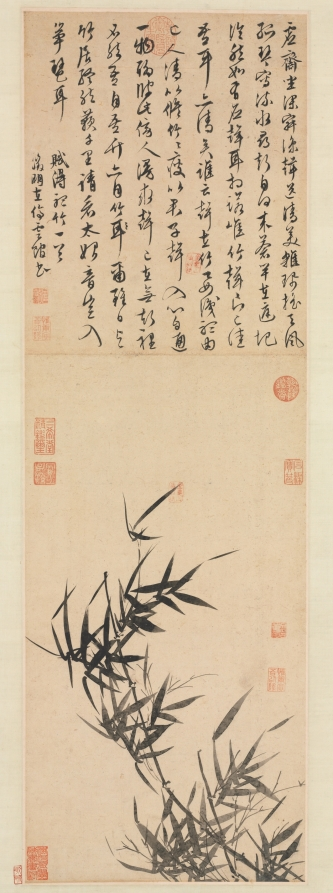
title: Listening to the Bamboo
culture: China, Ming dynasty (1368–1644)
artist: imitator of Wen Zhengming (Chinese, 1470–1559)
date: late 1400s-1500s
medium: hanging scroll, ink on sutra paper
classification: Painting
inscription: Artist's inscription, signature, and 2 seals on the separate sheet of paper above the painting: In the empty studio sitting in deep loneliness;/ Like cool sound sending pure beauty,/ Or pendants swinging in the wind,/ Or a solitary qin suggesting running water./ Where is that sound from?/ The green poles in the courtyard,/ Clear and light like an echo,/ The sound and ears are in tune./ The sound of bamboo now very beautiful;/ My ears are also clear./ Who says the sound is in the bamboo?/ To know it depends on oneself./ A noble person is like a tall bamboo;/ A thin bamboo is like the noble man./ When the sound enters, the mind responds,/ Only one thing but artificially separated./ A bystander searching for the sound,/ But the sound can only be found in silence./ Otherwise I am still I,/ Bamboo is still bamboo./ Even if I live with bamboo every day,/ Still the music will be a thousand miles away./ Look at sound's most primeval source:/ Did it enter a zither or a lute? Composing a poem on Listening to the Bamboo. Written by Zhengming at the Ting yun guan. Wen Zhengming [2 seals] Wen Zhengming yin 文徵明印; Wei geng yin wu yi jiang 惟庚寅吾以降.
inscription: [印] 文徵明印; 惟庚寅吾以降.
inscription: 5 seals of the Qianlong emperor (r. 1736-95)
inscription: [印] 金粟山藏經紙